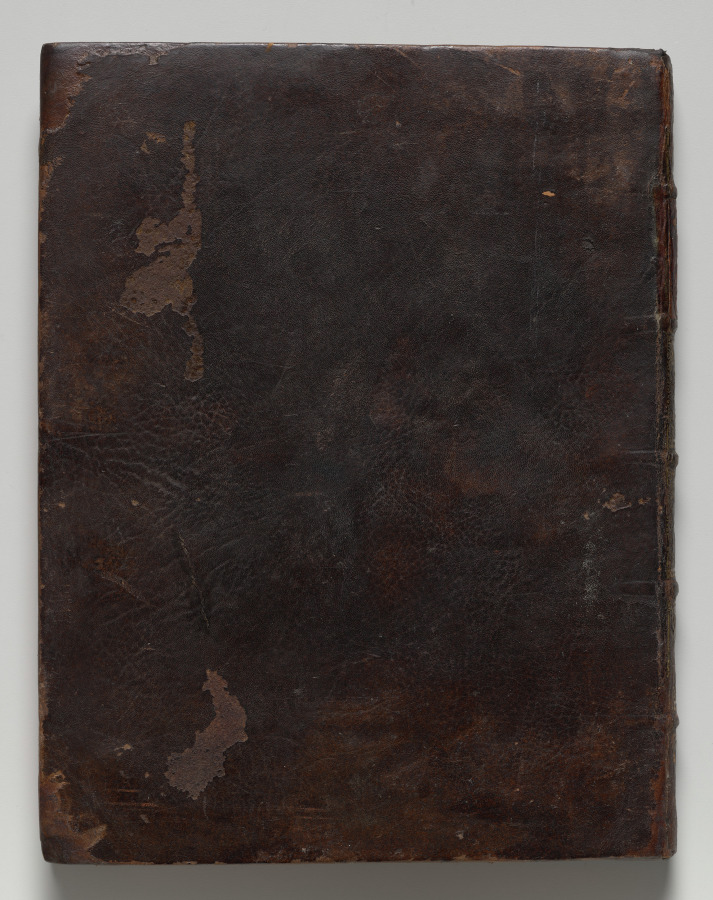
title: The Exercise of Armes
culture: Netherlands, The Hague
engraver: Jacob de Gheyn II (Netherlandish, 1565–1629)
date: 1607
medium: leather bound paper, 117 engraved plates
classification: Bound Volume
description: The Exercise of Armes, published in 1607–8, is one of the most famous manuals of arms. Jacob De Gheyn's book became popular all over Europe and was quickly translated into several languages. Its 117 copper engravings portray the step-by-step sequence for training foot soldiers in the handling of standard weaponry of 17th-century warfare: muskets, matchlock or calivers, and pikes.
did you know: The depiction of the soldiers in this book inspired Rembrandt when painting his famous The Night Watch.